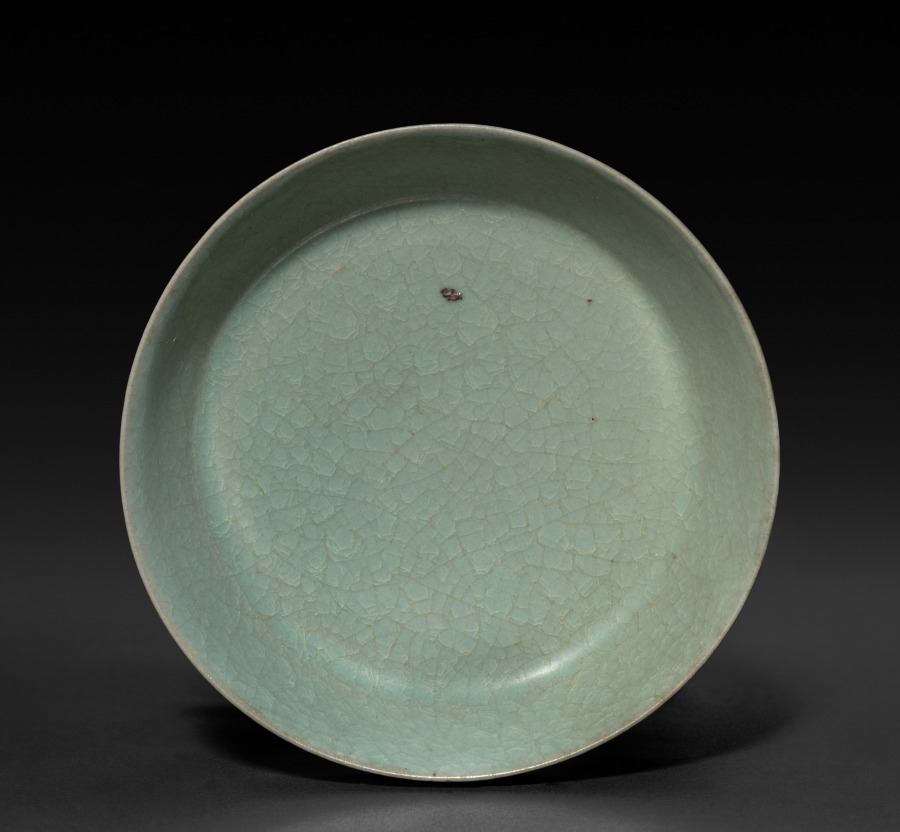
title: Brush Washer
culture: China, Henan Province, Baofeng, Qingliangsi, Northern Song dynasty (960-1127)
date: late 1000s–1127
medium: porcelaneous stoneware, Ru ware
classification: Ceramic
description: Ru ware is the rarest and most celebrated of all Chinese imperial wares. It was made for the late Northern Song court for a very short time and was therefore extremely rare and precious. Simplicity and refined elegance are Ru ware's hallmarks. Its graceful shape, soft luster, and subtle color variation of the glaze interact in perfect unity. Other physical characteristics include an ash-grey body, soft greyblue glaze with a fine crackle, as well as small sesame-seed spur marks on the base.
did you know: The little black spot in the glaze inside the dish is one of the slight imperfections characteristic of genuine Ru ware.